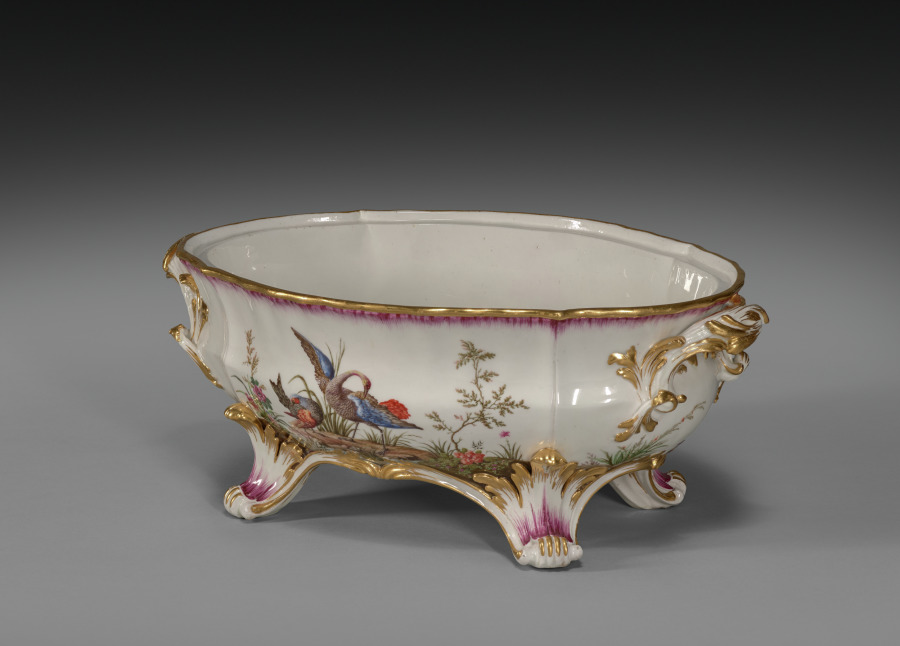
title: Tureen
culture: France, Vincennes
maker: Vincennes Porcelain Factory (France, 1740–56)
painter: attributed to Louis-Denis Armand (French, active c. 1745–1783)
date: c. 1752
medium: soft-paste porcelain with enamel and gilt decoration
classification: Ceramic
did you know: This object was manufactured in soft-paste porcelain, a material used by many European porcelain factories before they were able to emulate the hard-paste porcelain of China and Japan.